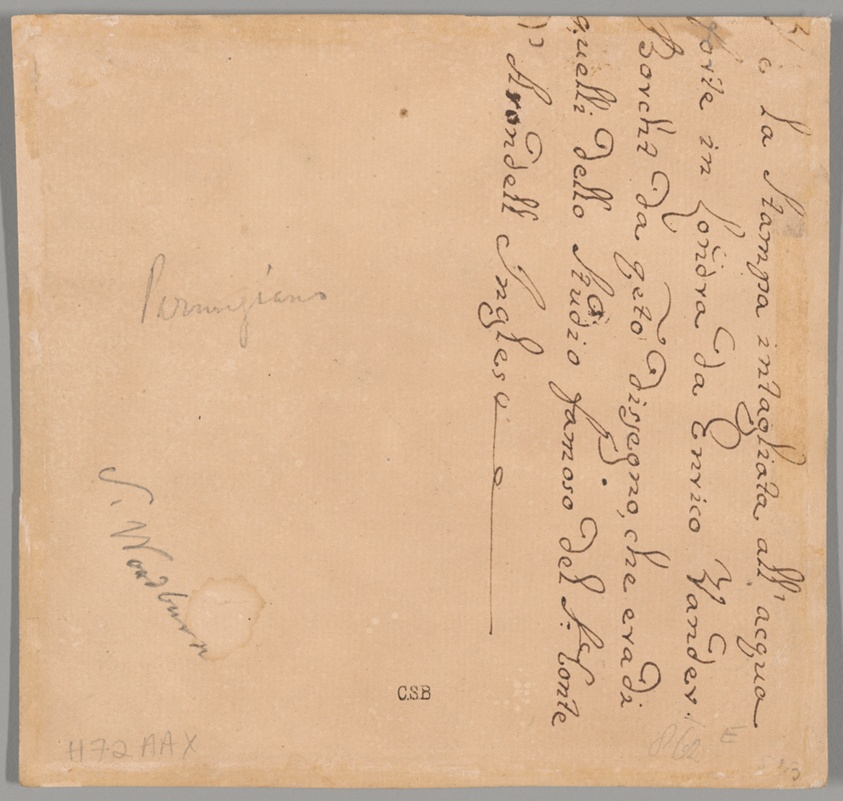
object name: Drawing and Watercolor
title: Group of Nine Standing Figures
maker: Francesco Mazzola, called Parmigianino; Italian, 1503-1540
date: 1524/27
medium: Pen and brown ink and brush and brown wash, on tan laid paper, laid down on tan laid card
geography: Italy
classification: ink and wash; drawings (visual works); prints and drawing